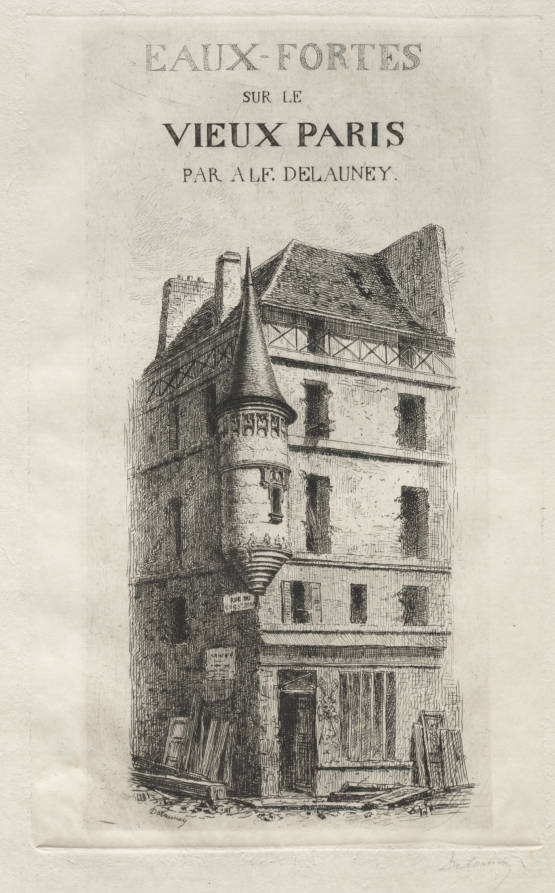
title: Tourelle rue de coq Saint-Jean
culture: France, 19th century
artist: Alfred Alexandre Delauney (French, 1830–1894)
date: c. 1870–94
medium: etching and drypoint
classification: Print